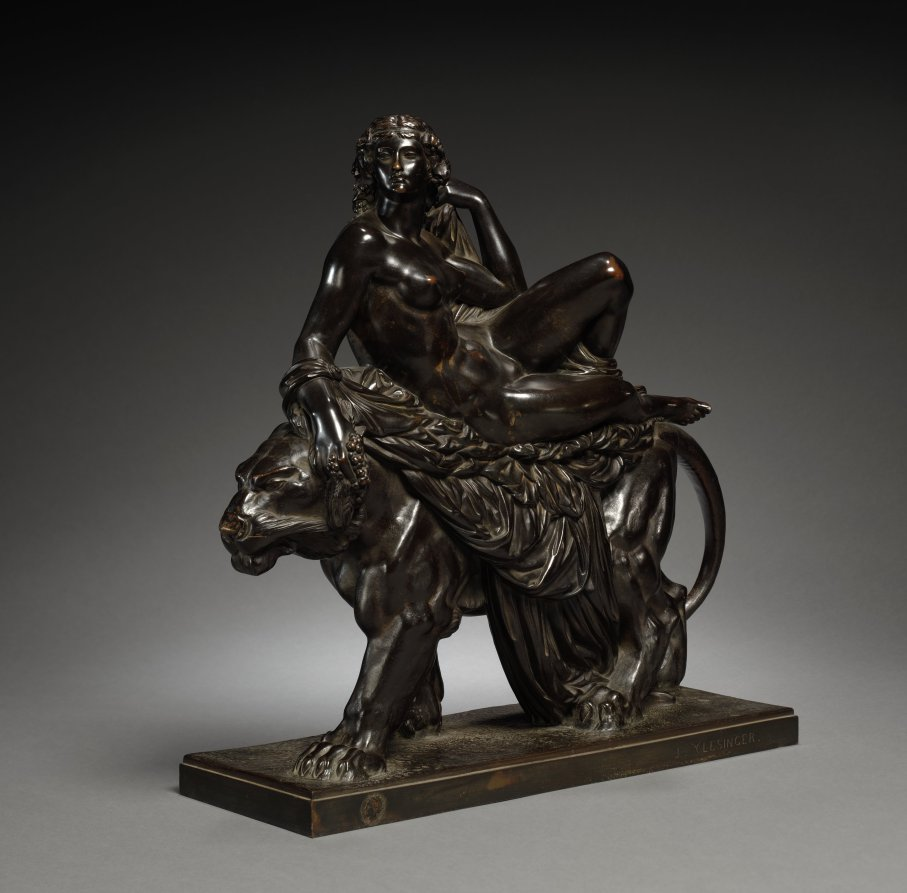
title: Ariadne on a Panther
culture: France, 19th century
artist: Jean-Baptiste Clésinger (French, 1814–1883)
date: 1873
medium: bronze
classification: Sculpture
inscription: signed on side of base: "J. CLESINGER"; inscribed around edge of stamp: "BRONZE ARTISTIQUE/DE PARIS"; on cut of neck of woman, "CAYUZ"; on edge of base: "1 Rue de la PAIX."